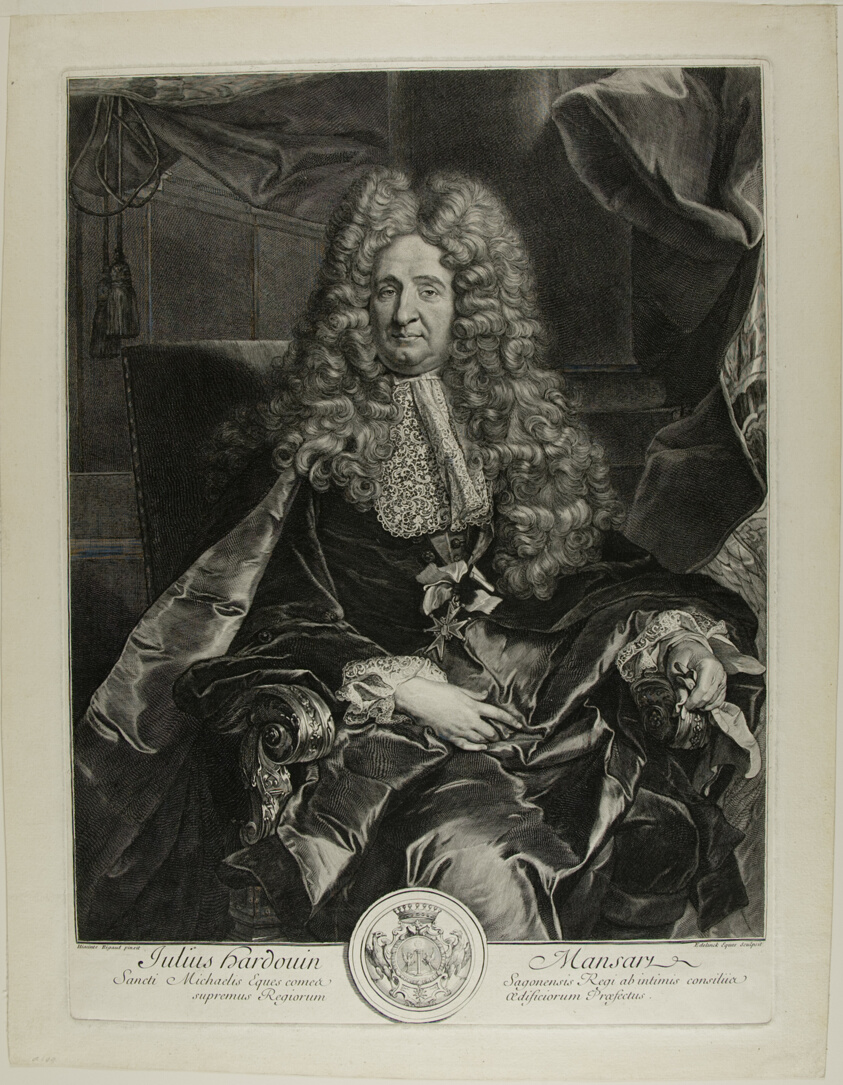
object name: Print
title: Jules Hardouin Mansart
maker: Gérard Edelinck (French, born Flanders, 1640-1707); after Hyacinthe Rigaud y Ros (French, 1659-1743)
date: 1704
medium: Engraving on paper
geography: France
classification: etching; print; prints and drawing